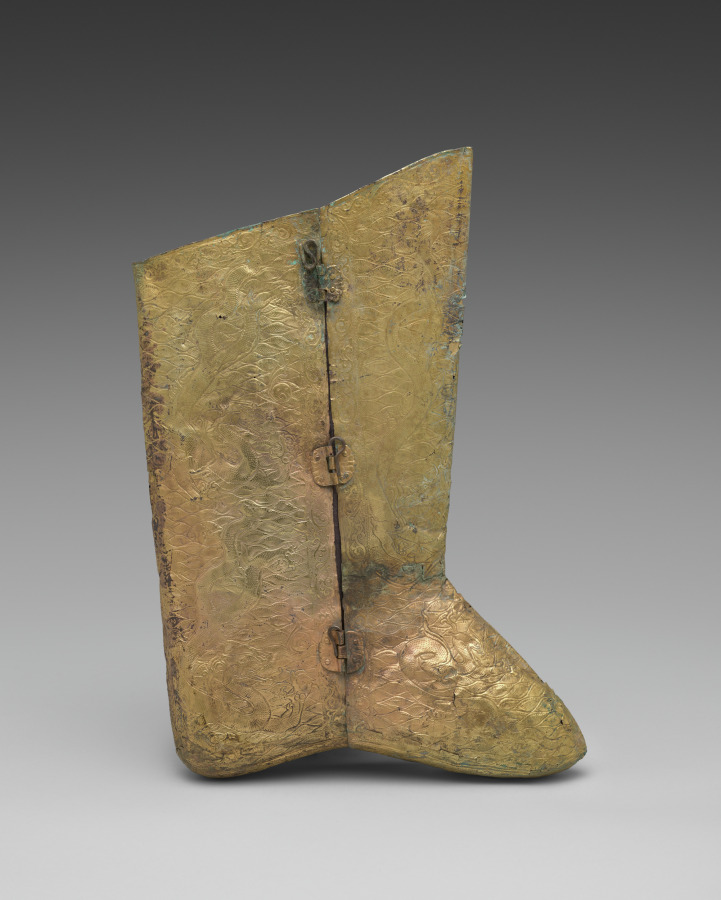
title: Gilt-bronze Boot, One of a Pair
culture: Northern China, Liao dynasty (907-1125)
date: 907–1125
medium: Gilt-bronze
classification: Metalwork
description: Bronze and silver-gilt boots, modeled after textile and leather boots, were found in Liao tombs. A pair of silver-gilt boots (dated 1018 or earlier) with phoenix motifs and cloud scrolls, were excavated from the tomb of Princess Chen and Xiao Shaoju in Inner Mongolia at Qinglongshan town in Naiman Banner; the couple’s faces were covered with gold masks. This gilt-bronze boot shows rising dragons chasing pearls and may have been made for a male tomb occupant.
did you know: The boot's dragon motif suggests that the wearer was a male princely member of the ruling family.